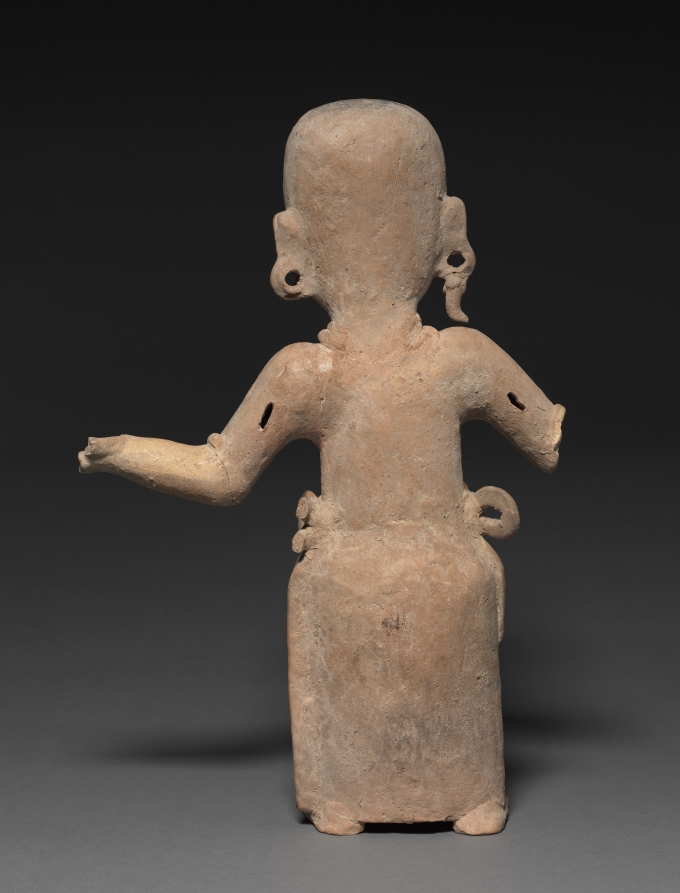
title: Female Figure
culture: Mexico, Southern Veracruz, Limon, Remojades Monumental Sculpture type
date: 200–500 CE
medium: pottery with burnished buff slip and asphalt paint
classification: Sculpture